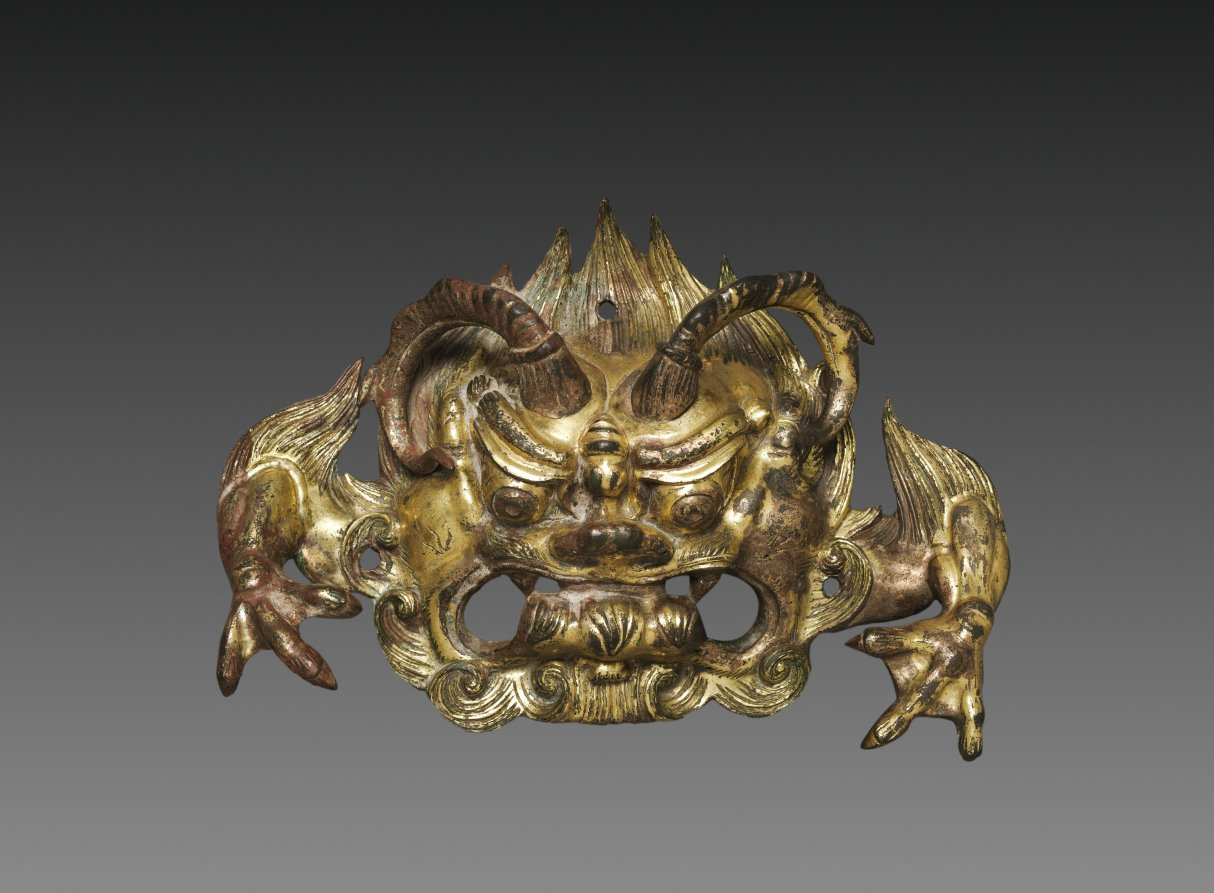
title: Monster Face: Door Ring Holder (Pushou)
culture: China, Henan province, Northern Dynasties period (386–581 CE)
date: 500s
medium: gilt bronze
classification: Metalwork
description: This gilt bronze Door Ring Holder is in the form of a monster head with curving horns, protruding eyes, three-clawed paws, curling beard, and flame-shaped hair. The tongue dangles from the mouth, in which the creature originally grasped a ring. While it had a practical function as a door knocker, the intimidating form could also frighten away both intruders and evil spirits.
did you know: Three rivet holes (one on the forehead and one by each limb) were used to nail the mask onto a door.